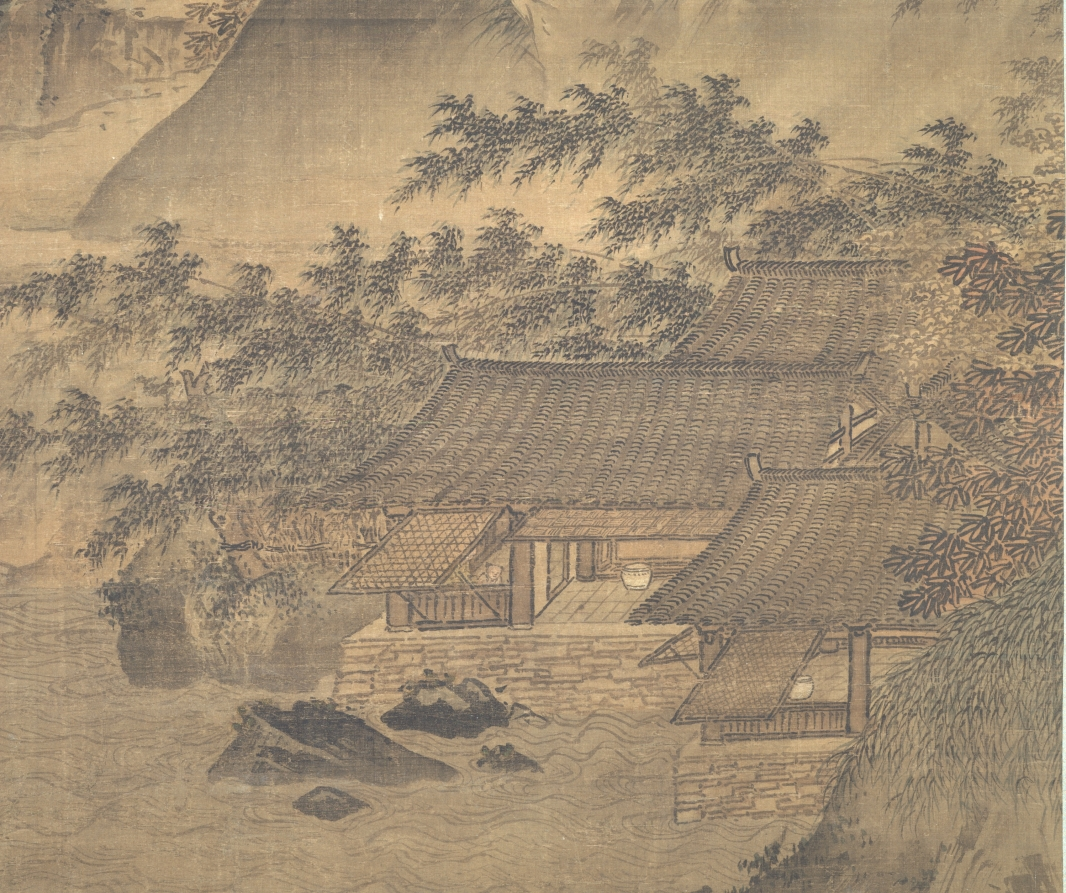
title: River Village in a Rainstorm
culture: China, Ming dynasty (1368–1644)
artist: Lu Wenying (Chinese)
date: c. 1480–1507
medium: Hanging scroll; ink and slight color on silk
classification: Painting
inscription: 呂文英 [印] 日近清光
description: In this scene, windswept rain pelting a village captures the power of nature in a masterful composition. Lü Wenying from Zhejiang served as a court painter during the Hongzhi era (1488–1505). Hardly known, with few remaining works, he is considered a Zhe school painter who followed the style of the Southern Song academy. Zhe school painters, named after the province of Zhejiang, transformed the poetic scenery of the Southern Song artists into dramatic, large-scale views. Active in the same region with frequent monsoon rains in the summer season, artists were familiar with outbreaks of rain and storms.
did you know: A young boy peeks out a window perhaps viewing the two people struggling through the rain.